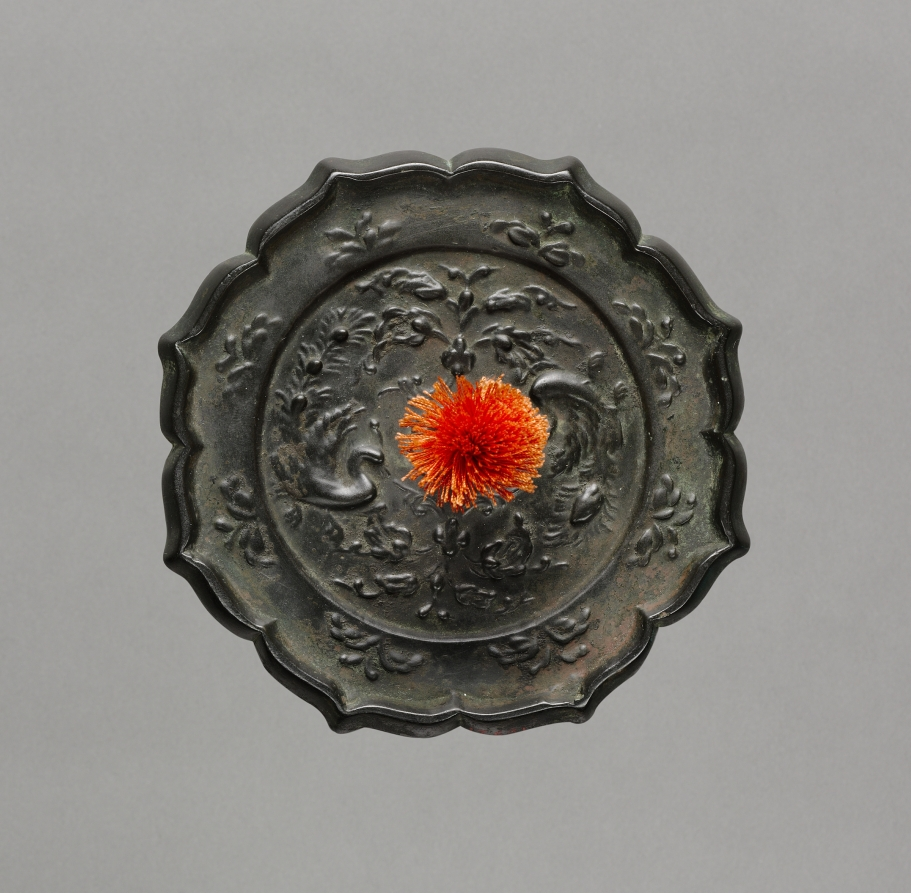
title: Mirror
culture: Japan, Heian period (794–1185)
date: 794–1185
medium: bronze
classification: Metalwork